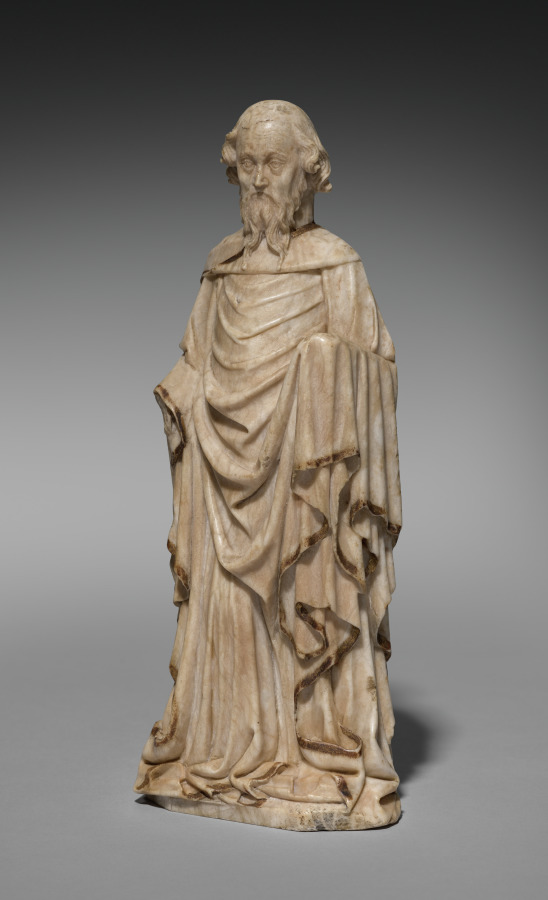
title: Standing Apostle (Saint Paul?)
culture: Southern Netherlands or Northern France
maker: Master of the Saint-Omer Apostles (Southern Netherlandish, active Bruges?)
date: c. 1430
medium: Alabaster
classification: Sculpture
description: This sculpture comes from an altarpiece in the cathedral of Saint Omer in northern France. Four other figures have been preserved there, and possibly one at the Metropolitan Museum in New York. The workshop was probably located in Bruges, in what is now Belgium. Sculpture was the leading art genre at that time. The specialized workshops obtained the stone alabaster from distant quarries, in this case from the area of Würzburg in Bavaria (Germany), to form it intricately and deliver it to customers in almost all of Europe.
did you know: Alabaster is very soft; after 20 minutes of treatment with water the surface will dissolve.